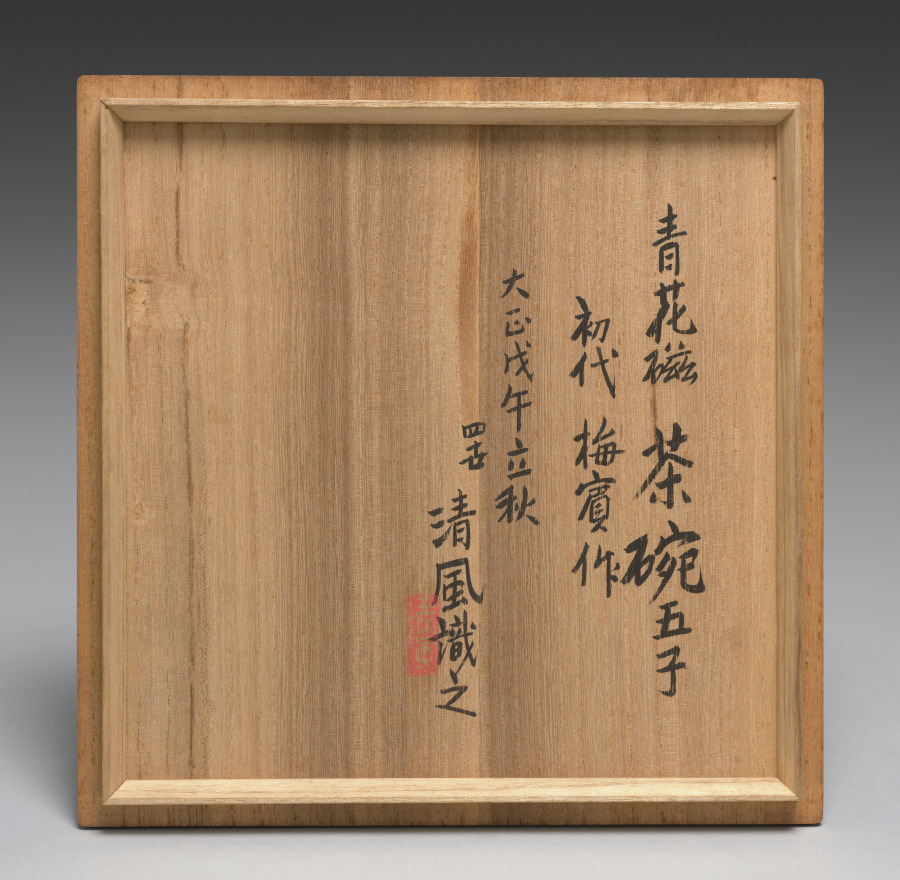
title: Teacups with Dragons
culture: Japan, Edo period (1615–1868)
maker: Seifū Yohei I (Japanese, 1801–1861)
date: 1840s–57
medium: Set of five tea cups; porcelain with underglaze blue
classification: Ceramic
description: Seifū Yohei I made both blue and white porcelains after Ming dynasty (1368–1644) Chinese wares fired in the kilns at Jingdezhen for export. He also made colorful stoneware in the style of his teacher, Nin’ami Dōhachi (Takahashi Dōhachi II) (1783–1855).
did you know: A small figure of an elephant serves as the handle for the lid.